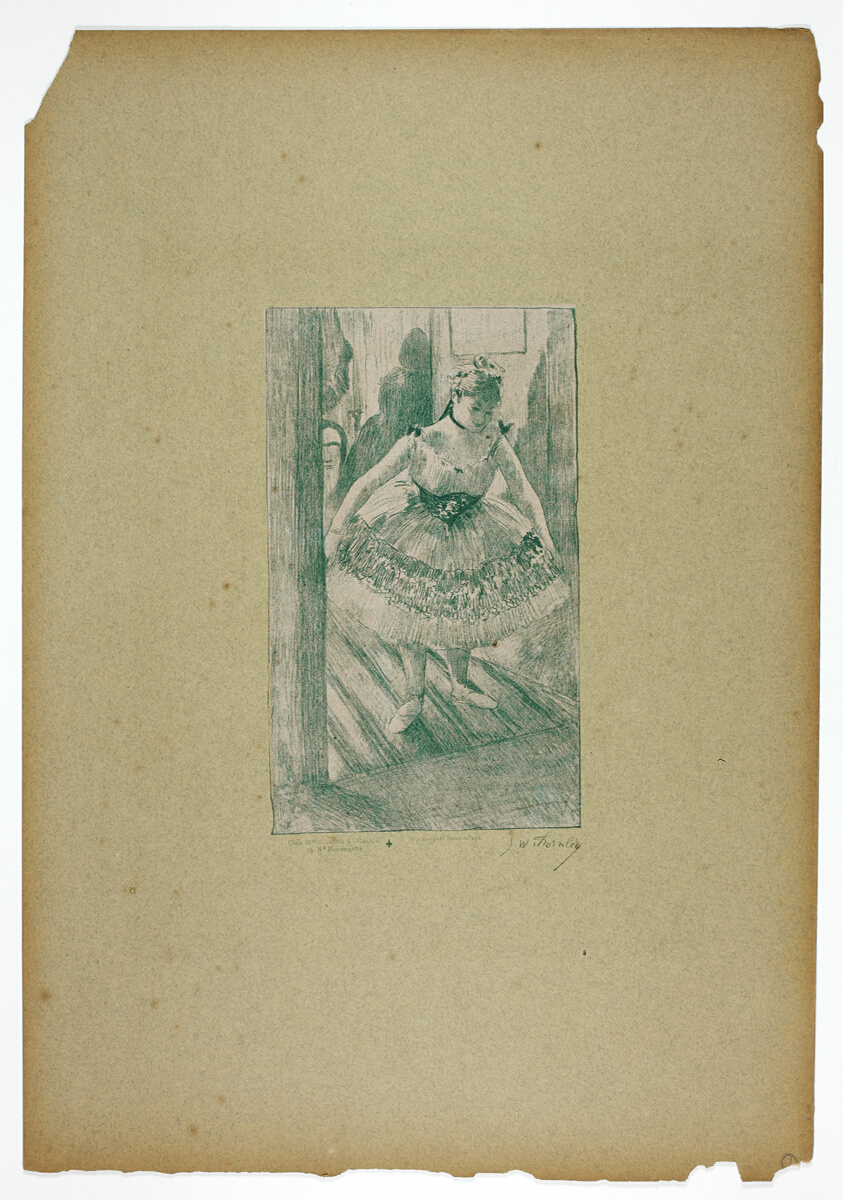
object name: Print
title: Going on Stage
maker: Georges-William Thornley (French, 1857-1935); after Edgar Degas (French, 1834-1917); printed by Atelier Becquet (French, 19th century); published by Boussod, Valadon, & Company (French, 18th-19th century)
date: 1889–90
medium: Lithograph in green on paper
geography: France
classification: lithograph; print; prints and drawing